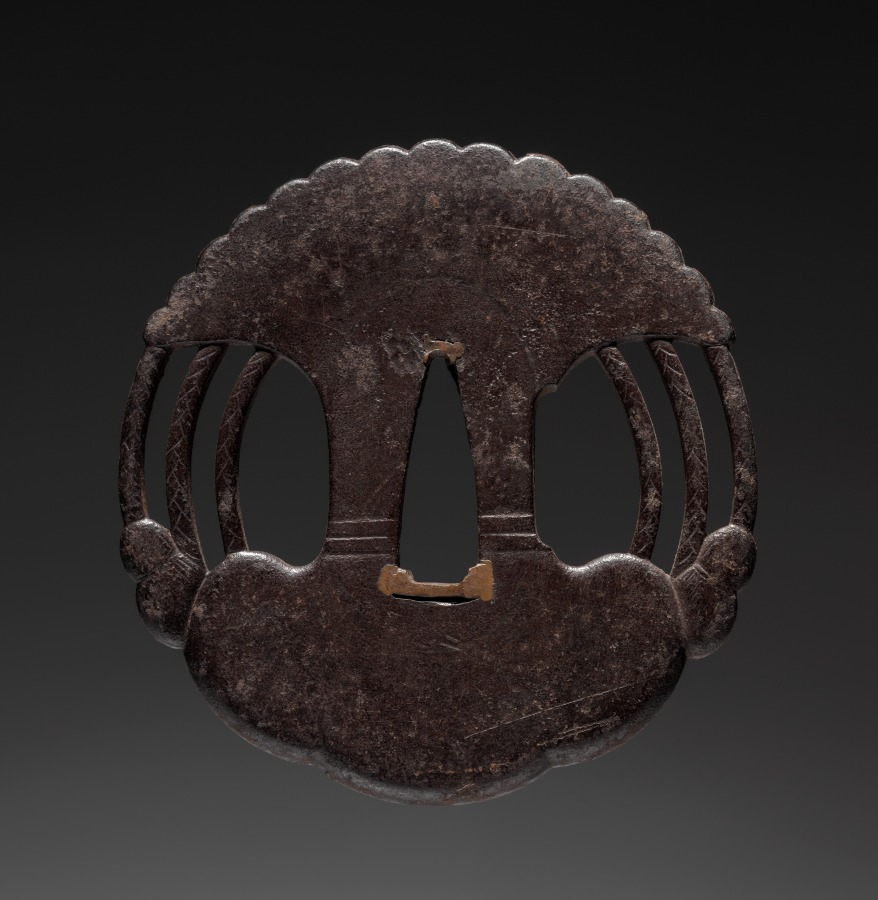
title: Sword Guard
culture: Japan, Edo period (1615–1868)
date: early 1800s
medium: iron (Akao type)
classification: Arms and Armor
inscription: signed "Tatsunaga, residing at Kofu [Edo]."